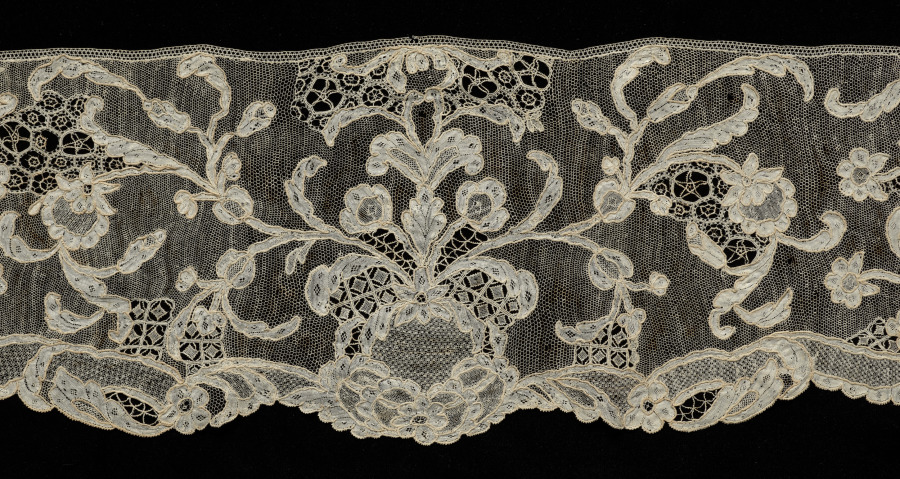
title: Lace Collar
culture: Italy, Burano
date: 1700–1740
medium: Linen: needle lace (Burano Point)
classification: Lace